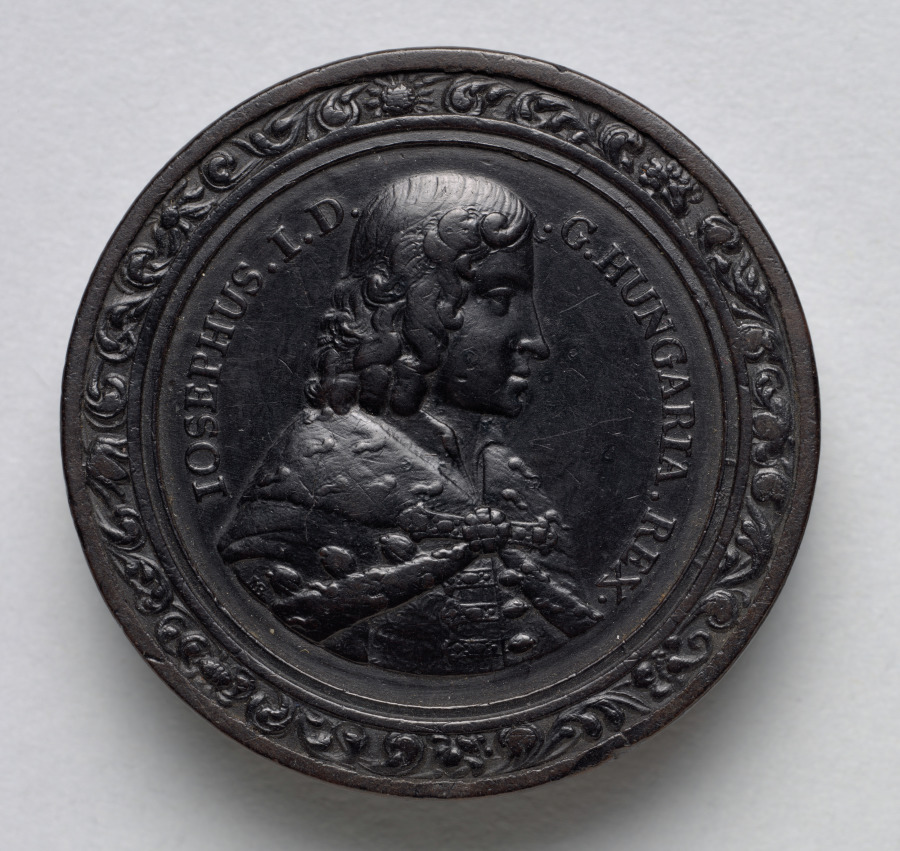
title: Gaming Piece (reverse)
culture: Germany, late 17th-early 18th Century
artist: Martin Brunner (German, 1659–1725)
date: c.1700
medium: wood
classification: Furniture and woodwork